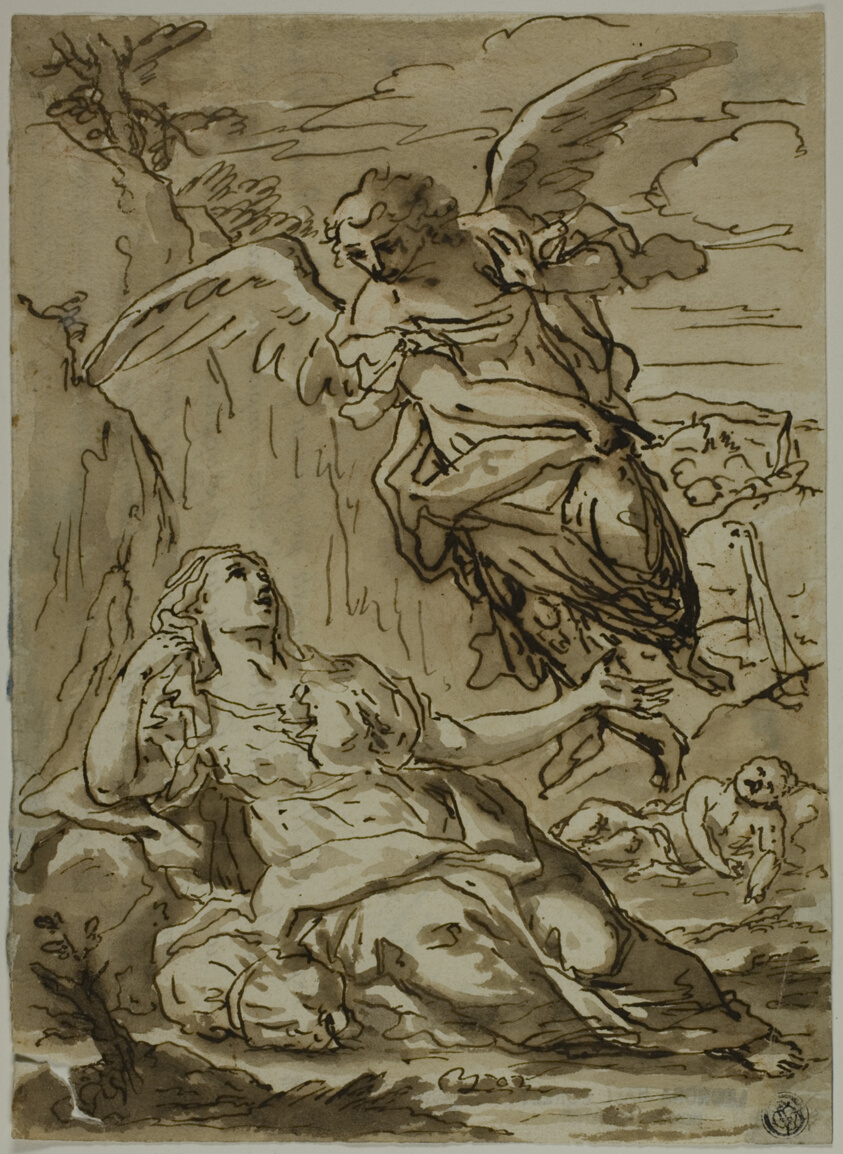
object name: Drawing and Watercolor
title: Angel Appearing to Hagar in the Wilderness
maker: Pietro Gualla (Italian, 1698-1757)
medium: Pen and brown ink, with brush and brown wash, over red chalk, on ivory laid paper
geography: Italy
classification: pen and ink drawings; drawings (visual works); prints and drawing